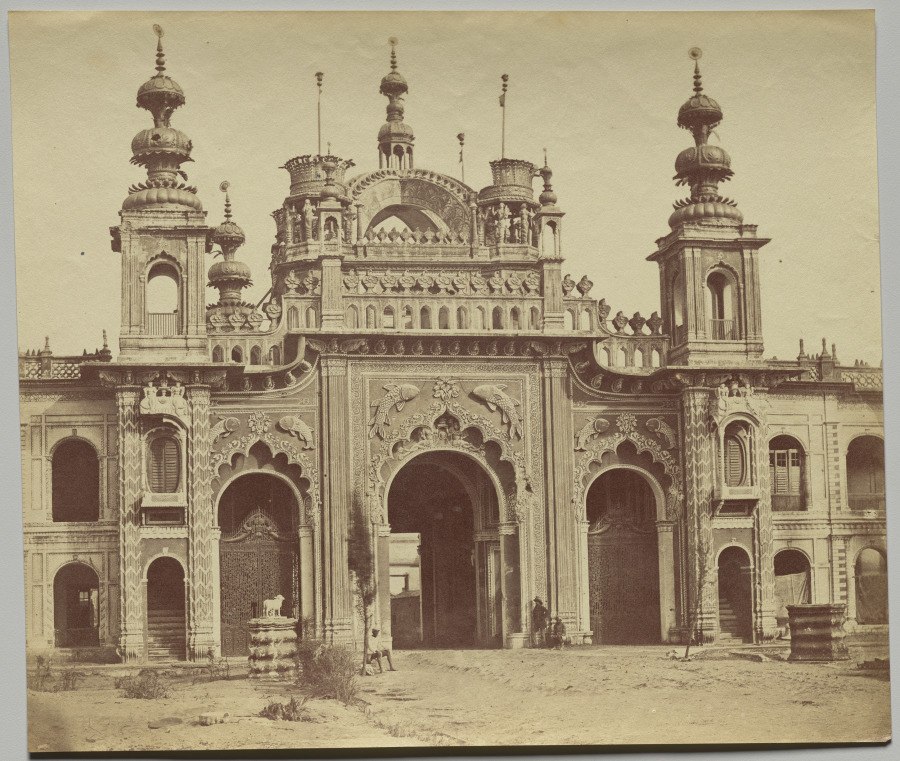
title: The Great Gateway of the Kasierbagh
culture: England, 19th century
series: Lucknow After the Siege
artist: Felice A. Beato (British, 1832–1909)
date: 1858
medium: albumen print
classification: Photograph